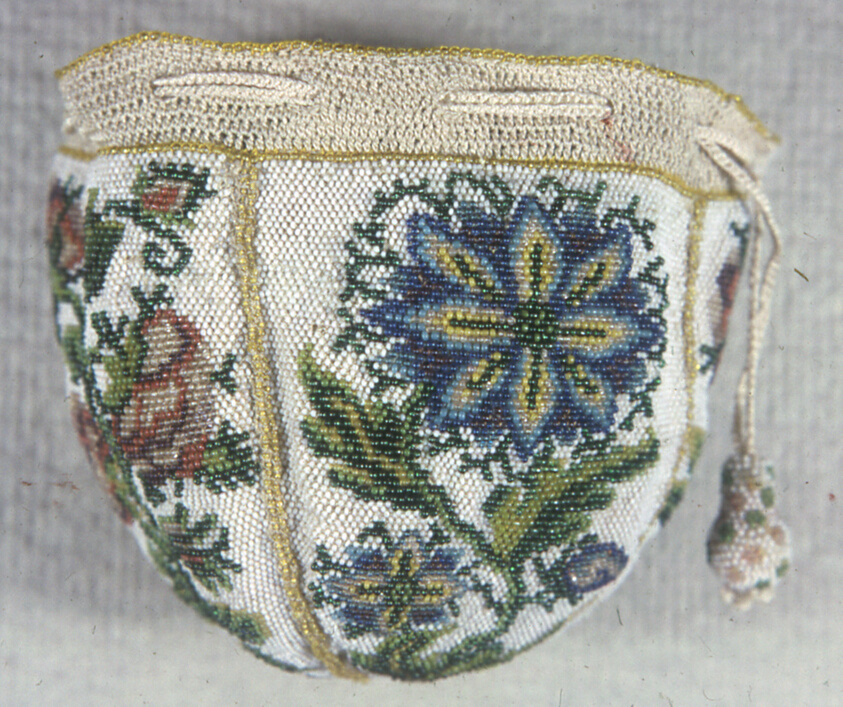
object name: Costume and Accessories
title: Bag and Samplers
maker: France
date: Mid–18th century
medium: Sablé; white ground with floral design in colored beads; also needles, thread and extra beads used in the making of Sablé bags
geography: France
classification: textile; bag - needlework; costume accessory - bag; costume accessory; bead; costume; dress (garment); clothing